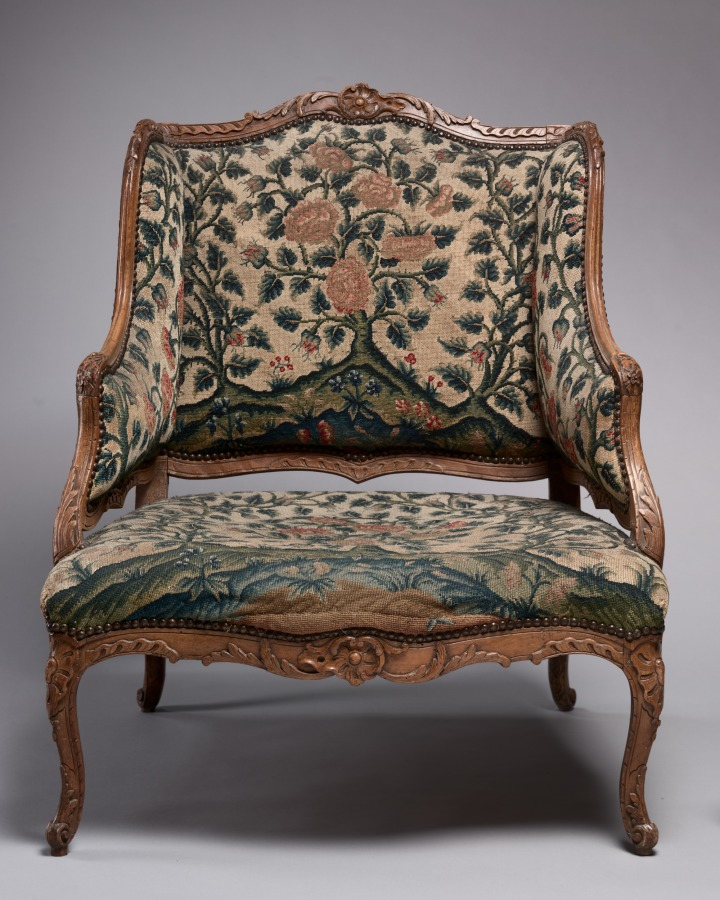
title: Daybed (Duchesse brisée)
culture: France, style of Louis XV, 20th century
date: c. 1890–1940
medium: carved wood frame upholstered in needlework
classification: Furniture and woodwork